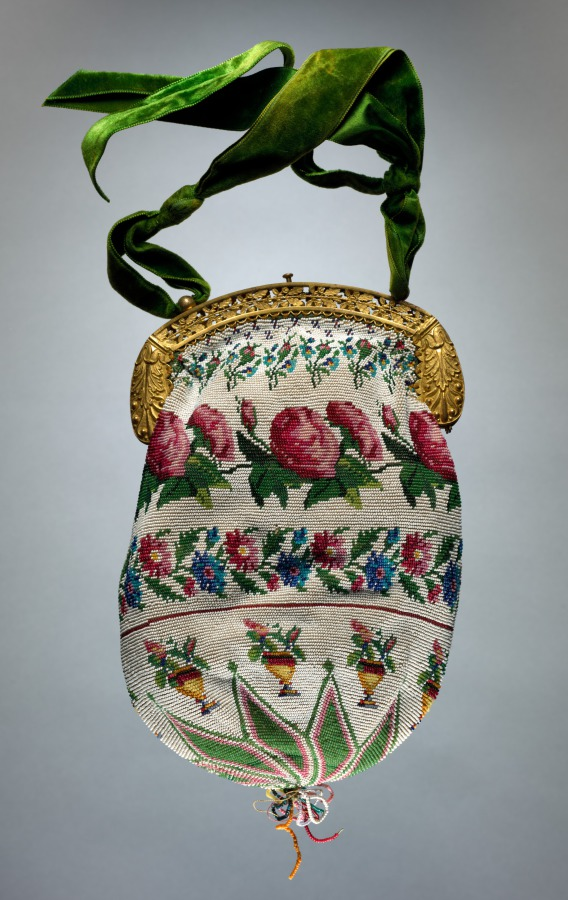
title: Beaded Bag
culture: America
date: 19th century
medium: glassbeads, crocheted with silk thread, metal purse frame, velvet ribbon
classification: Garment